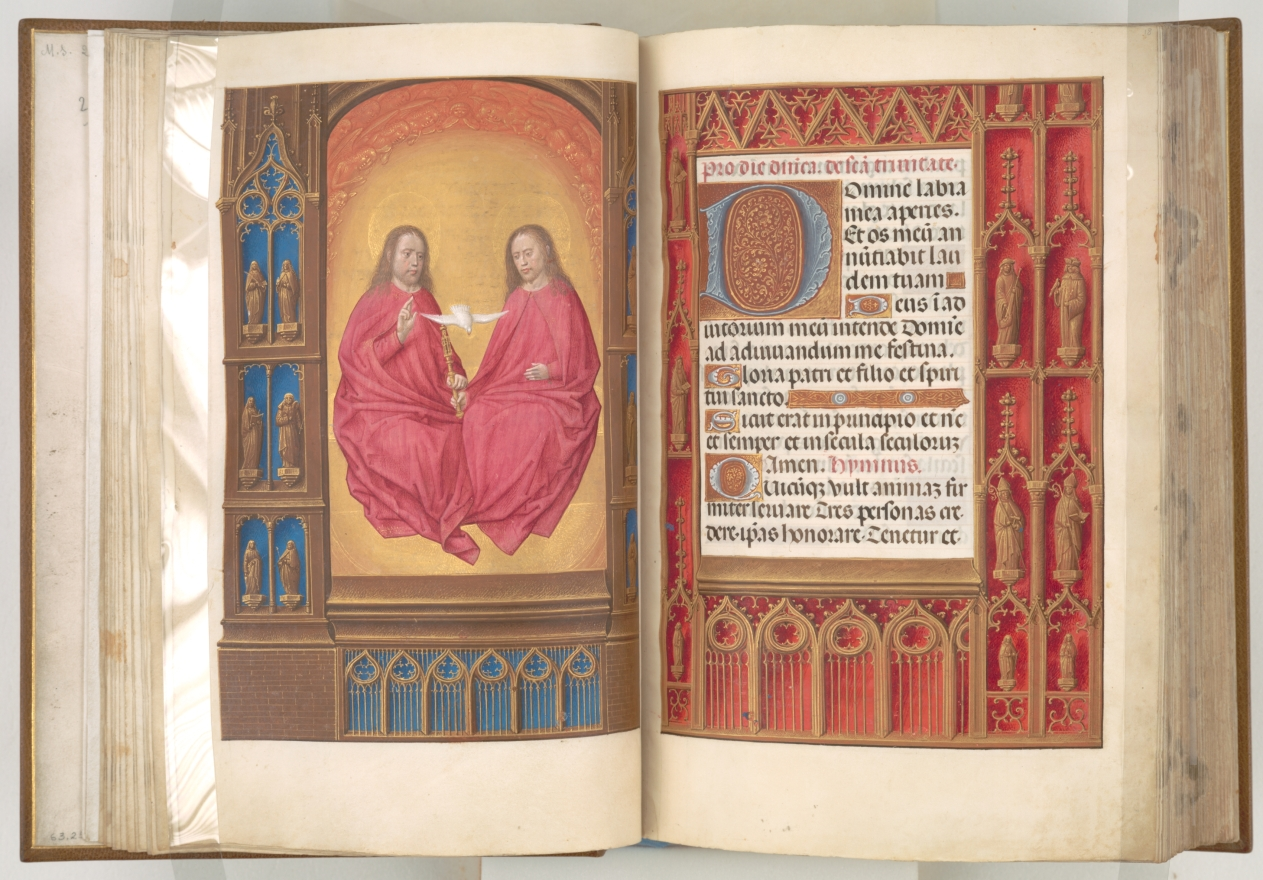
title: Hours of Queen Isabella the Catholic, Queen of Spain: Fol. 17v, The Trinity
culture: Flanders, Ghent and Bruges, late 15th century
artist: Master of the First Prayerbook of Maximillian (Flemish, c. 1444–1519)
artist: and Associates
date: c. 1500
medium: ink, tempera, and gold on vellum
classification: Bound Volume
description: This manuscript was illuminated by a circle of at least five highly organized manuscript painters active in the Flemish cities of Ghent and Bruges. The principal illuminator was Alexander Bening, who painted the majority of the book's miniatures. Manuscripts produced by this circle of artists are renowned for the decoration of their borders, which typically feature a rich variety of realistically-painted flowers, birds, and butterflies. This prayer book, called a book of hours, was intended not for a cleric, but for the private devotions of a lay person-in this case, Isabella the Catholic, Queen of Spain (1451-1504). Isabella's coat of arms embellishes the book's frontispiece. It is unlikely that the book was commissioned by the Queen herself; rather, she probably received it as a diplomatic gift from someone courting her patronage, perhaps Cardinal Francisco Jimenez de Cisneros. A Franciscan friar, Jimenez was dependent upon Isabella for his advancement, first to the post of Queen's confessor in 1492, and then to Archbishop of Toledo in 1495.